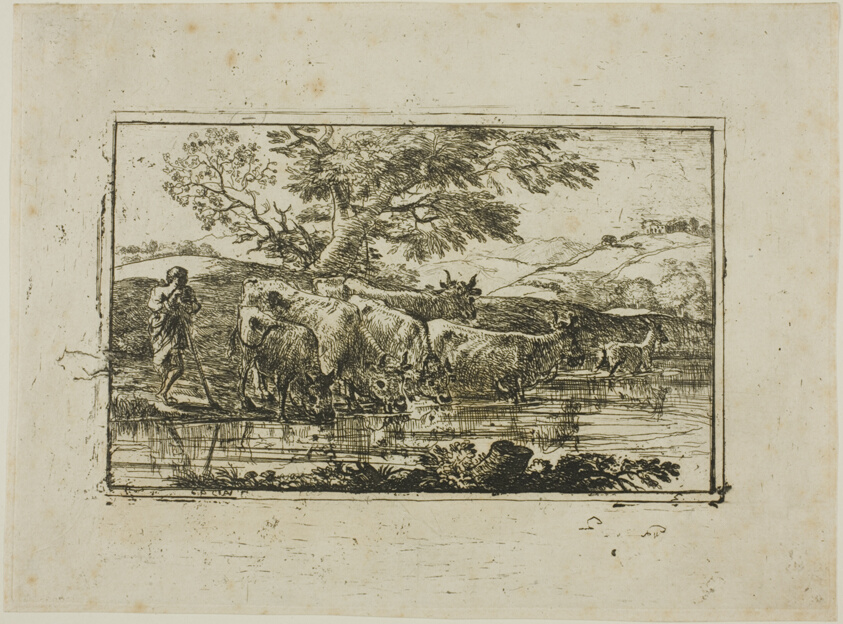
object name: Print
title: The Herd at the Watering Place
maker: Claude Lorrain (French, 1600-1682)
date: 1635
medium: Etching on ivory laid paper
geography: France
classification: etching; print; prints and drawing